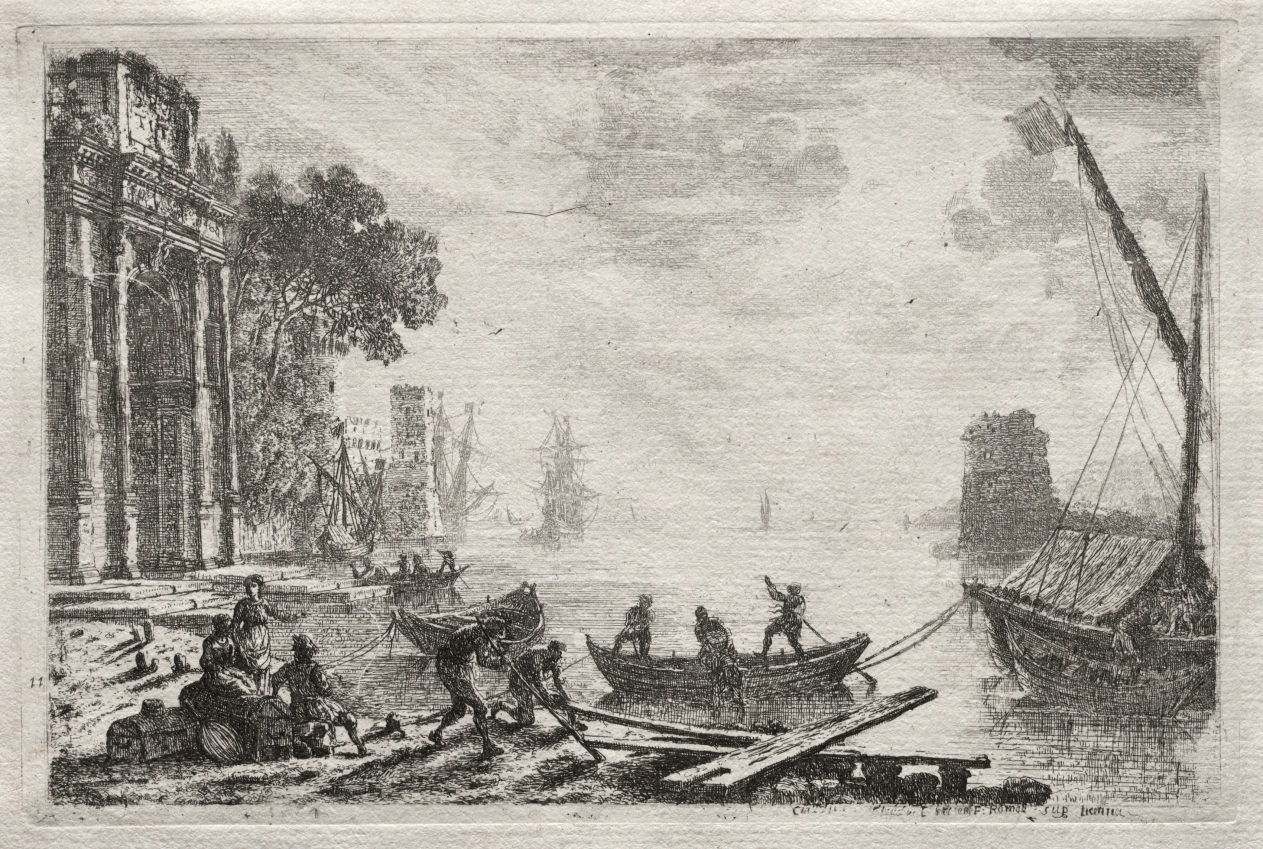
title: The Sunset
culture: France, 17th century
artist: Claude Lorrain (French, 1604–1682)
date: 1634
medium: etching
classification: Print